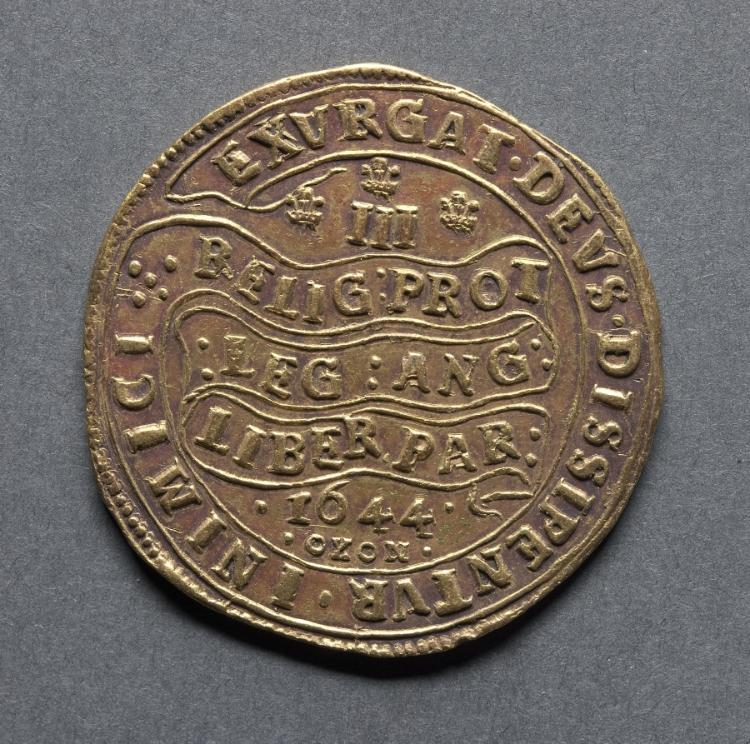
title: Triple Unite or Three Pound Piece: Declaration on Scroll (reverse)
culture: England, Charles I, 1625-1649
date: 1644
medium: gold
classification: Coins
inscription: in center on a continuous scroll: RELIG : PROT : LEG : ANG : LIBER : PAR :"; below, "1644 . OXON."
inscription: EXURGAT DEUS DISSIPENTUR INIMICI